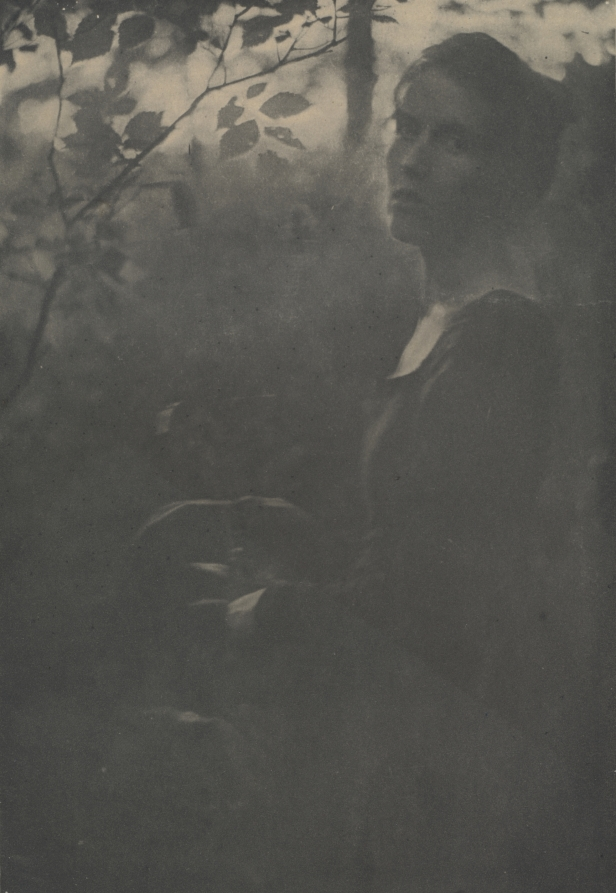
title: The Edge of the Wood - Evening (Letitia Felix)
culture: America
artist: Clarence H. White (American, 1871–1925)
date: 1900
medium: photogravure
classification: Photograph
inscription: Written in pencil on recto: "Clarence H. White [signed] '00"; in pencil on verso: " 'The Edge of the Wood-Evening'- / Clarence H. White"; in pen on verso: "Letitia Felix"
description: Clarence H. White experimented with an array of artistic media that blurred the lines between photography, drawing, and printmaking. Here are two examples of that experimentation: a platinum print on the left and a photogravure on the right. White was likely drawn to both processes for their broad tonal range and interaction of image and paper. To create platinum prints, a light-sensitive liquid emulsion is applied to and absorbed by the paper. The image forms within the paper’s fibers, resulting in a matte appearance. Because photogravures are printed like an etching, the image is formed with ink impressed onto the paper’s surface.